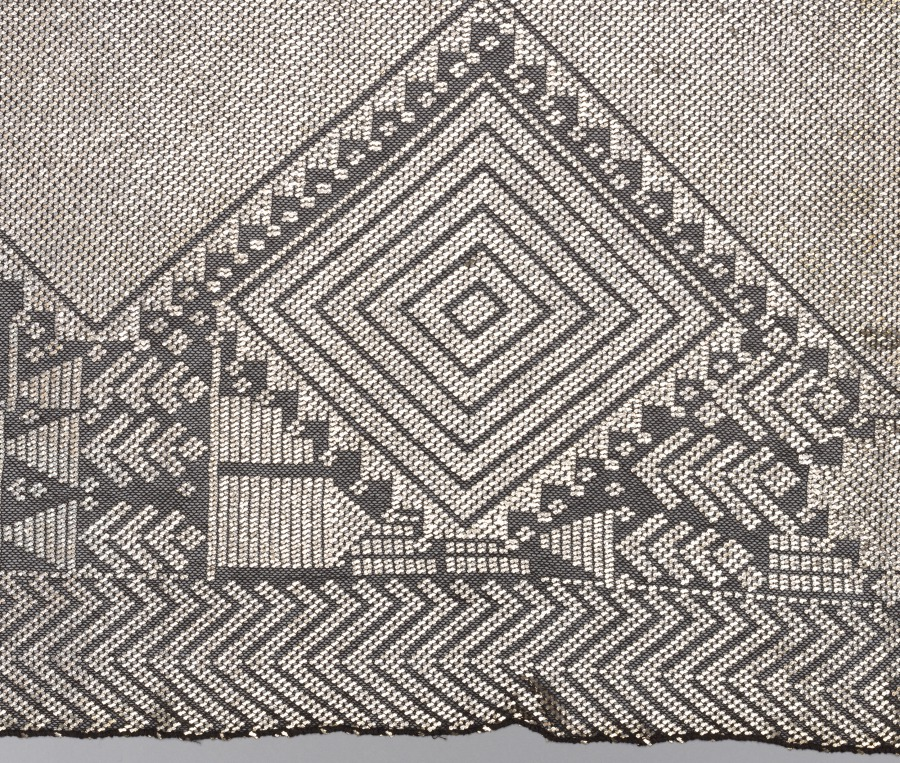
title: Scarf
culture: Africa, North Africa, Egypt, Assiut, Egyptian maker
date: early 1900s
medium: Probably cotton and silver-plated copper foil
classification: Garment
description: Egyptians may have innovated tulle-bi-telli (“net with metal,” also called assiut) after the French introduced machine-made netted fabric (tulle) in the late 1800s. It drew from telli, an earlier metal embroidery technique. Diamond and rectangle designs formed by knotting flattened silver wire into black tulle indicate this scarf’s early age in the genre. Urban Egyptian singers and dancers performed in heavy, shimmering tulle-bi-telli costumes during the late 1800s through the mid-1900s. Elite Egyptian city dwellers also wore it. Similar ones were sold at the 1893 World’s Columbian Exposition in Chicago and to tourists in Egypt, a possible origin for this example. In the US, tulle-bi-telli scarves were made into home decor and 1920s flapper-style clothing.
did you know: There is so much metal in this shawl that it weighs nearly 4.5 pounds.